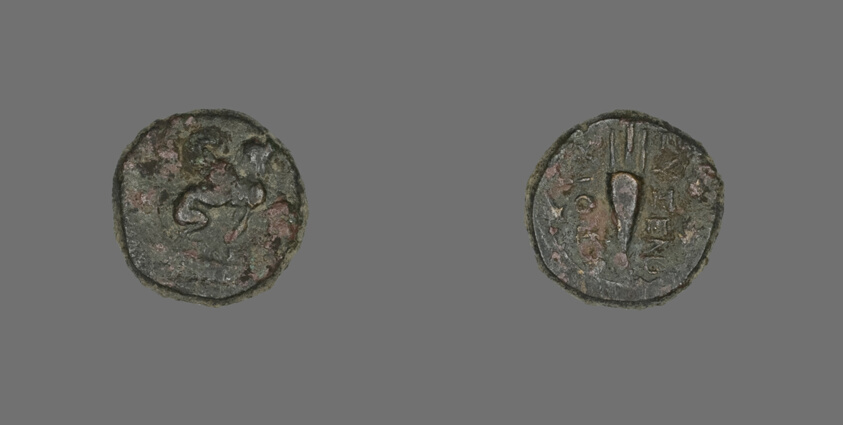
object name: Coin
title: Coin Depicting a Sphinx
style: imperial (roman)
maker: Greek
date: about 84 BCE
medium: Bronze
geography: Ancient Greece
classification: coin; ancient art